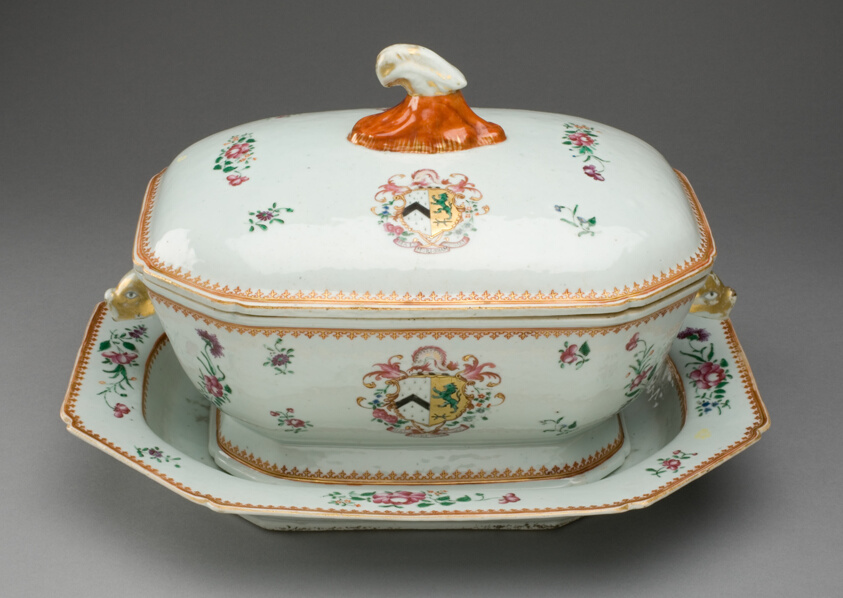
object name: Ceramics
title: Covered Tureen and Stand with the Arms of French Impaling Sutton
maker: China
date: c. 1765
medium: Hard-paste porcelain with polychrome enamels and gilding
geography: China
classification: ceramics